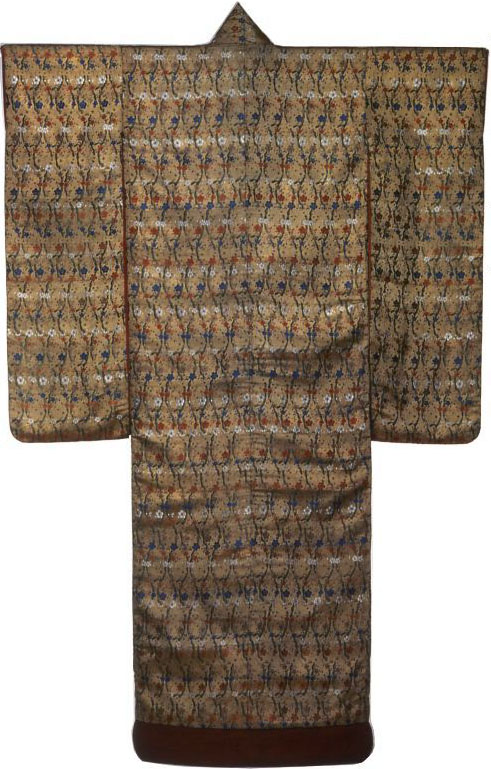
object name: Costume and Accessories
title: Furisode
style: late edo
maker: Japan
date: 18th century, late Edo period (1789–1868)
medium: Silk and gold-leaf-over-lacquered-paper strips, plain weave with supplementary patterning wefts bound on reverse face by secondary binding warps in plain interlacing; lined in red silk crepe (chirimen), plain weave; padded in silk, non-woven; dyed with safflower (beni)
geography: Japan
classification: textile; weaving; costume - weaving; kimonos; costume